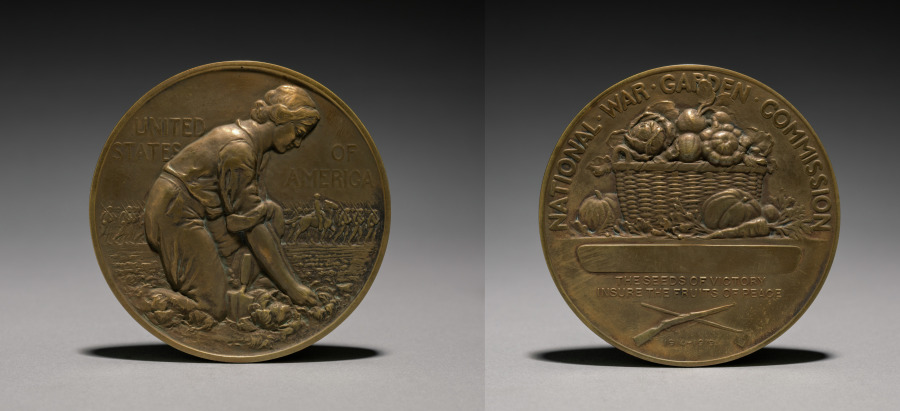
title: Medal: National War Garden Commission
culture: America, New York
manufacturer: Tiffany & Co. (America, New York, est. 1837)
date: c.1914–19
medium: bronze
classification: Metalwork